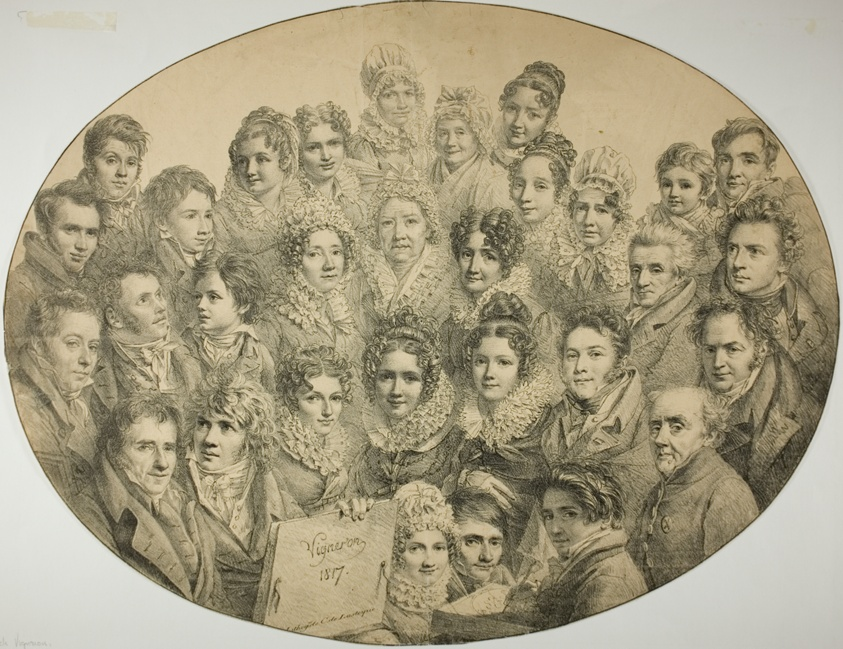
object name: Print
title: Portraits of 31 people in an Oval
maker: Pierre Roch Vigneron (French, 1789-1872); printed by Comte de Charles Philibert Lasteyrie du Saillant (French, 1759-1849)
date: 1817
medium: Lithograph in black on tan laid paper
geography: France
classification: lithograph; print; prints and drawing